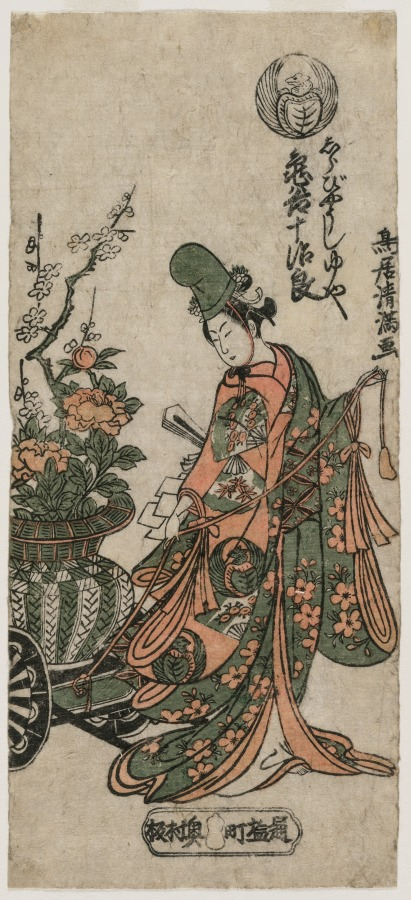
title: Kametani Jujiro as the Shirabyoshi Dancer Yuya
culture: Japan, Edo period (1615–1868)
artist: Torii Kiyomitsu (Japanese, 1735–1785)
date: c. early 1760s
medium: color woodblock print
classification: Print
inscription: Signature: Torii Kiyomitsu ga Publisher: Okumura (Torishiocho Okumura han)